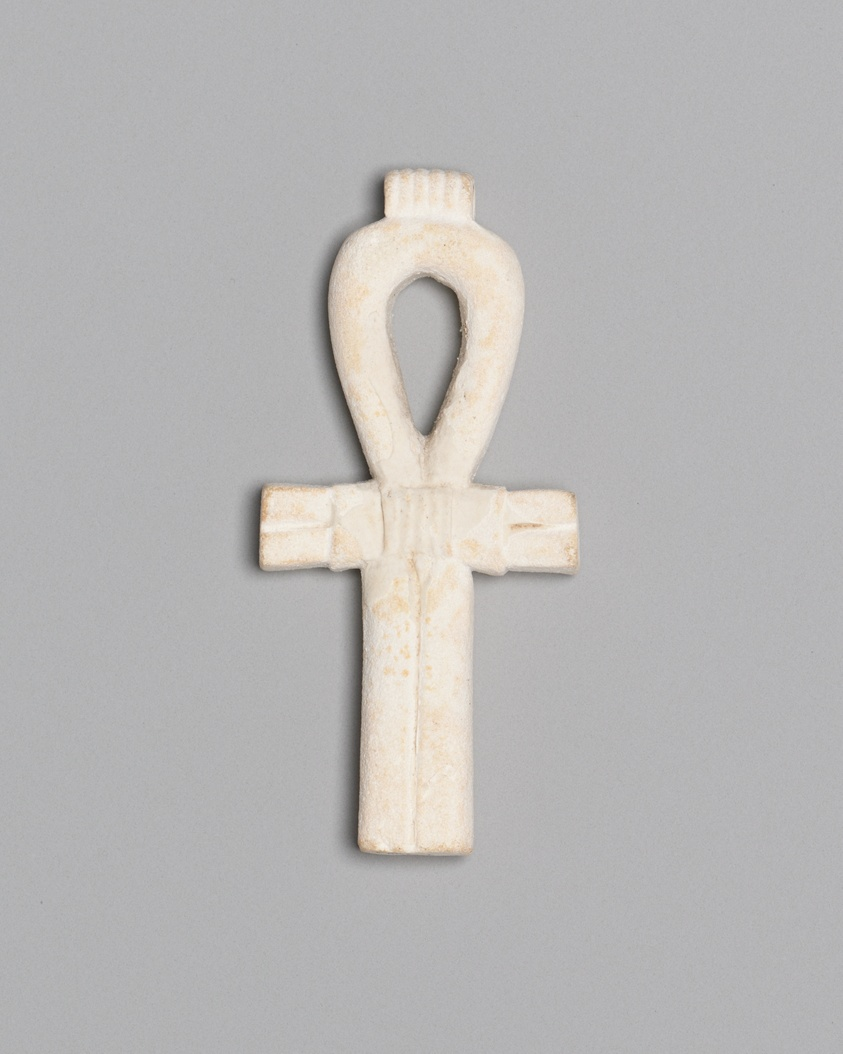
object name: Costume and Accessories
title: Amulet of an Ankh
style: third intermediate period, egyptian, ancient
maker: Egyptian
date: Third Intermediate Period–Late Period (1070–332 BCE)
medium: Low-fired earthenware or stucco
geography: Egypt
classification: amulet; ceramics; jewelry; ancient art; costume